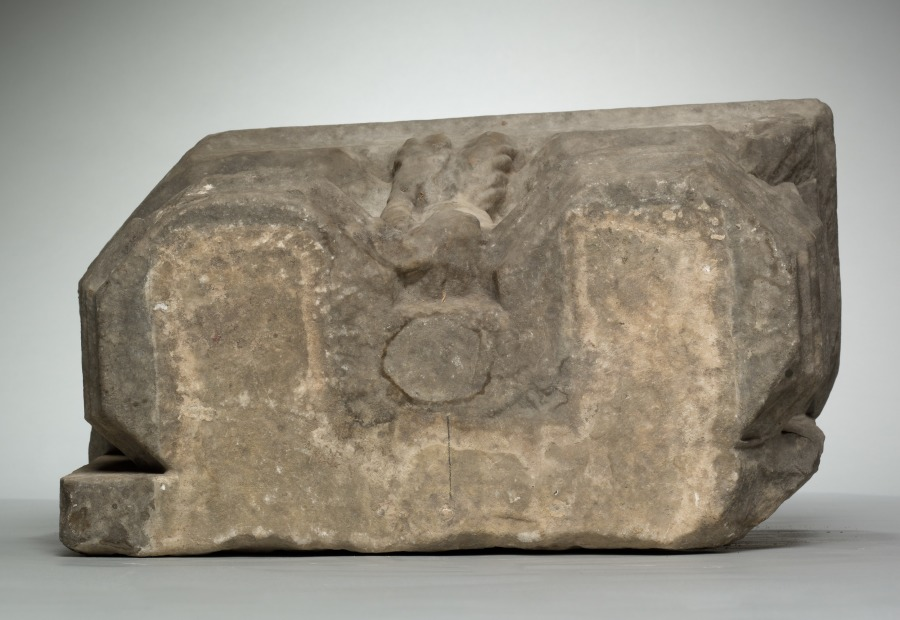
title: Double Column Base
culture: France, late 15th century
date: late 1400s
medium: marble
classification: Sculpture